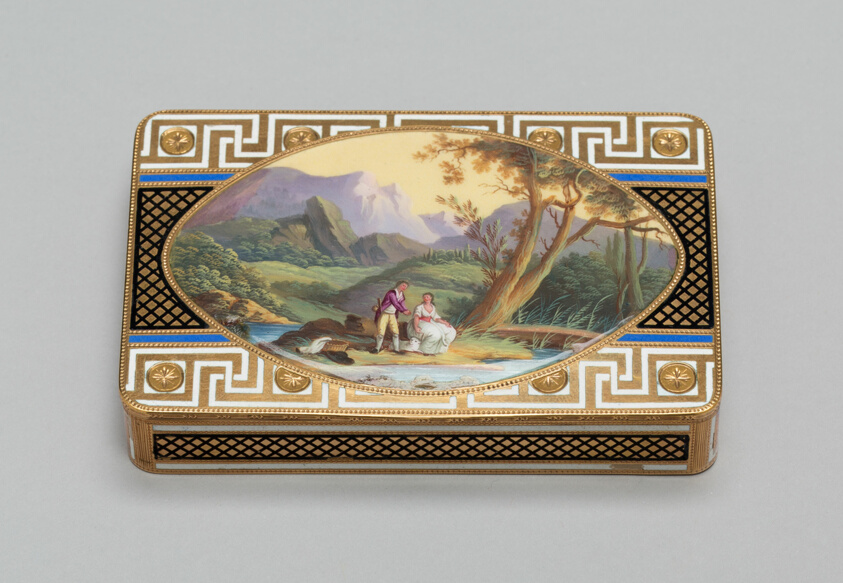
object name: Metalwork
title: Gold Box with a Scene of Two Figures in a Landscape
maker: Possibly Switzerland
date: c. 1800/10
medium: Gold and enamel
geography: Switzerland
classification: snuff box; european decorative arts; metalwork